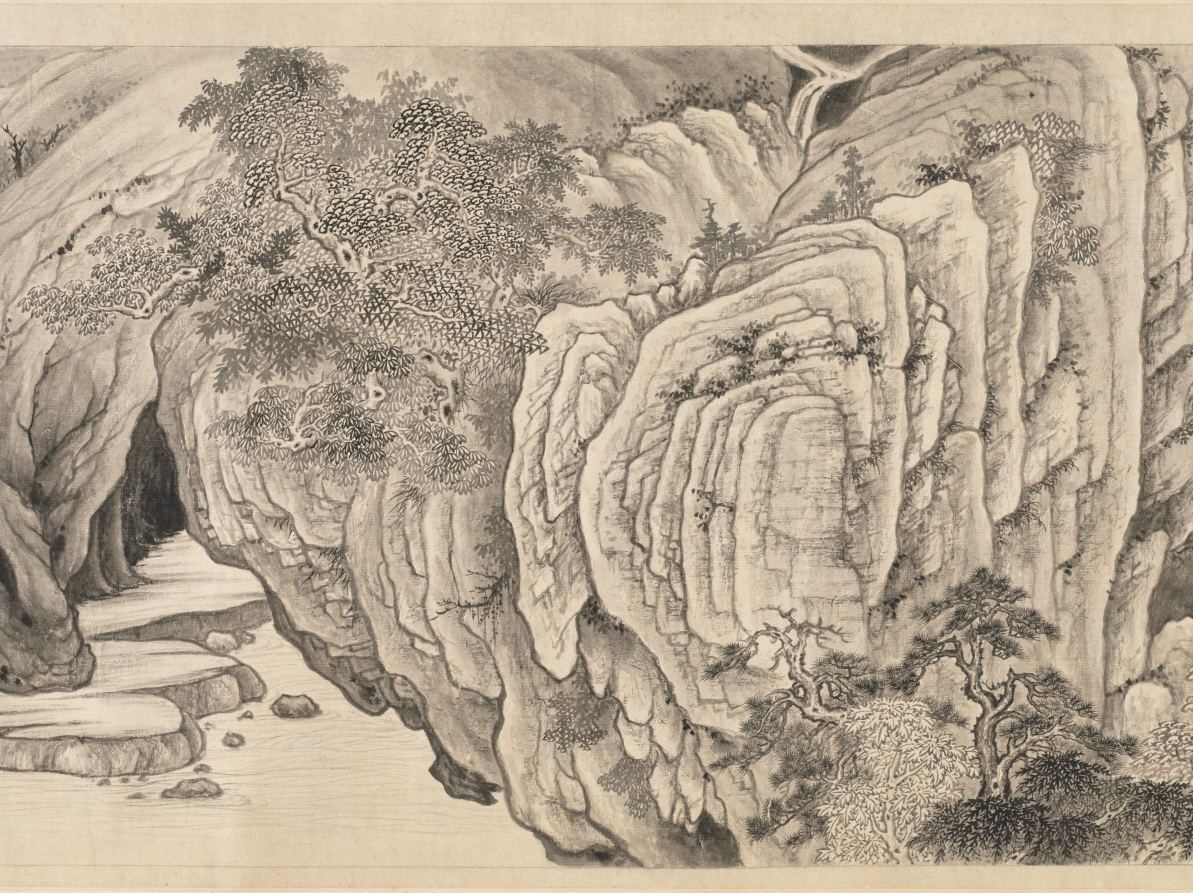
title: Meditative Visit to a Mountain Retreat: In Picture and in Words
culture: China, Ming dynasty (1368–1644)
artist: Xiang Shengmo (Chinese, 1597–1658)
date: 1648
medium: handscroll; ink on paper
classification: Painting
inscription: Artist's title and 3 seals (in front of painting): [title] Meditative Visit to a Mountain Retreat: In Picture and in Words 巖栖思訪圖詠 [3 seals] Tian lai ge zhong wen sun 天籟閣中文孫; Xiang shi kong zhang zui xin han mo 項氏孔彰醉心翰墨; Qing fu yuan zhong di yi miao ye 清福緣中第一妙業.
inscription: [印] 兔烏叟; 考古正今. 觀斯人兮何逍遙，非逍遙兮思其友。 思其友兮天一方，欲一訪之難回首。 松耶柏耶稱後凋，巖穴霏微何二酉。 山兮水兮人悠悠，遠莫致之神交否？ 河關一向望不及，言笑于今更非偶。 問游魚兮樂何深？問飛鳥兮歸何藪？ 問猿鶴兮何親疎？問鹿豕兮何夭壽？ 問白雲兮從何來？問流泉兮向何走？ 問漁樵兮何江山？問草木兮何畝畎？ 問春秋兮何炎涼？問世人兮何長久？ 問日月兮何晦明？曾見當時烏兔叟？ 戊子嘉平之初偶作此圖并題。 胥樵項聖謩識。 [印] 兔烏叟; 項氏孔彰; 未喪斯文.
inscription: 13 additional seals: 4 of Tang Zuomei 唐作梅 (late 18th–19th century); 3 of Zhang Baixi 張百熙 (1847–1907); 4 of Zhang Heng 張珩 (1915–1963); 2 unidentified.